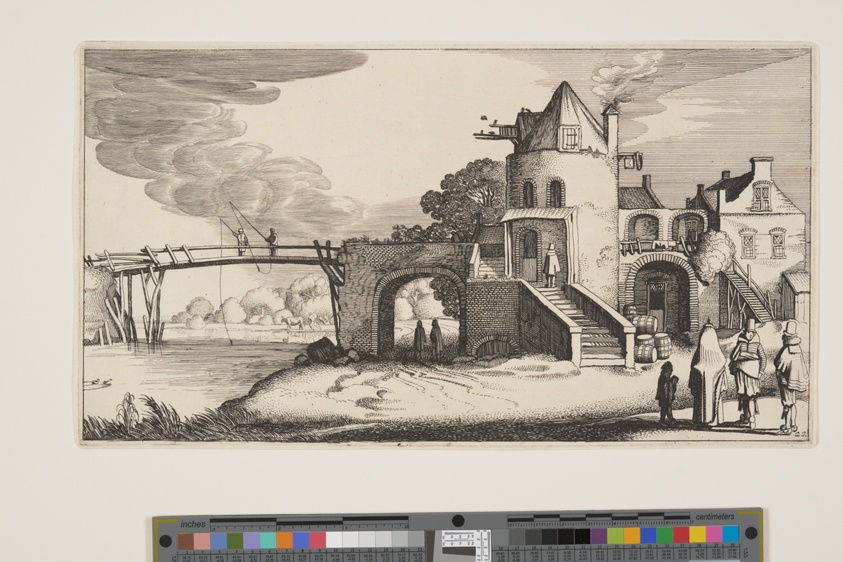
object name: Print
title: Bridge with a Toll-House, from Landscapes (Playsante Lantschappen)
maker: Attributed to Claes Jansz. Visscher II (Dutch, 1586-1652); after Jan van de Velde II (Dutch, c. 1593-1641)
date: c. 1641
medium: Etching, with engraving, on ivory laid paper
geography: Netherlands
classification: etching; paper; print; prints and drawing